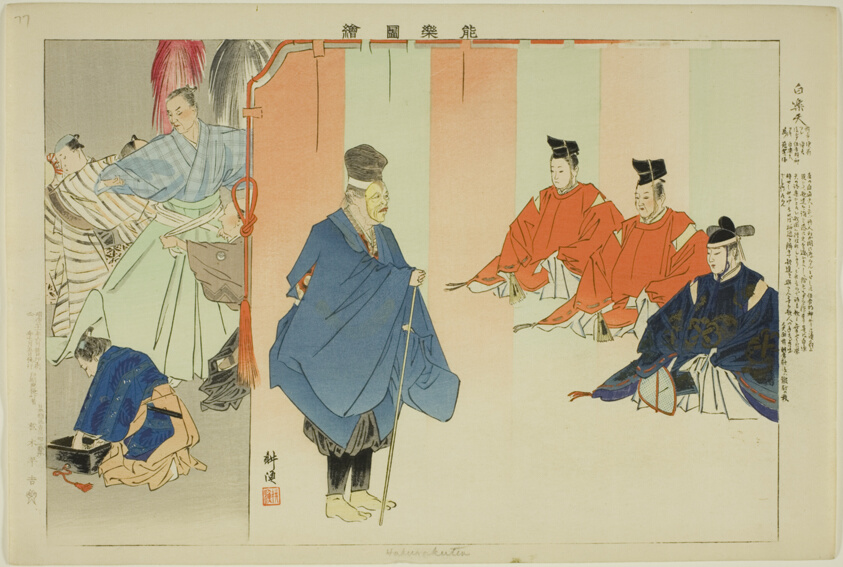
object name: Print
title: Haku Rakuten, from the series "Pictures of No Performances (Nogaku Zue)"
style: Japanese (culture or style)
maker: Tsukioka Kogyo; Japanese, 1869-1927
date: 1898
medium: Color woodblock print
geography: Japan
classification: woodblock print; print; asian art